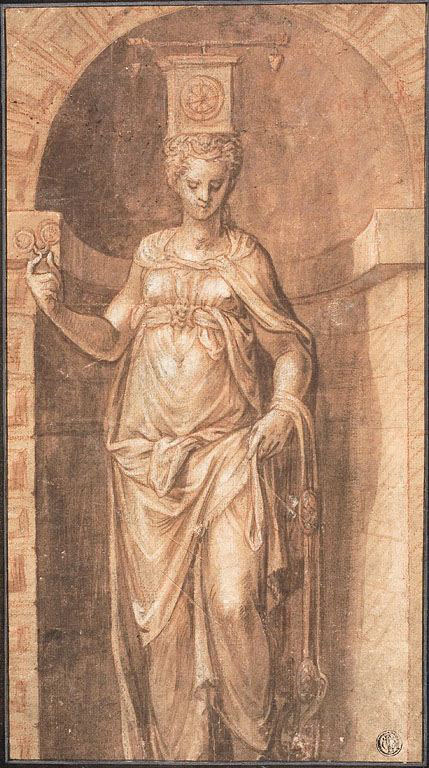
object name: Drawing and Watercolor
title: Temperance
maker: Italian, Veronese; Late 16th century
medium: Brush and brown wash over red and black chalk, heightened with white gouache, on tan laid paper, laid down on brown laid paper (tinted blue on recto)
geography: Italy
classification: chalk and wash; drawings (visual works); prints and drawing